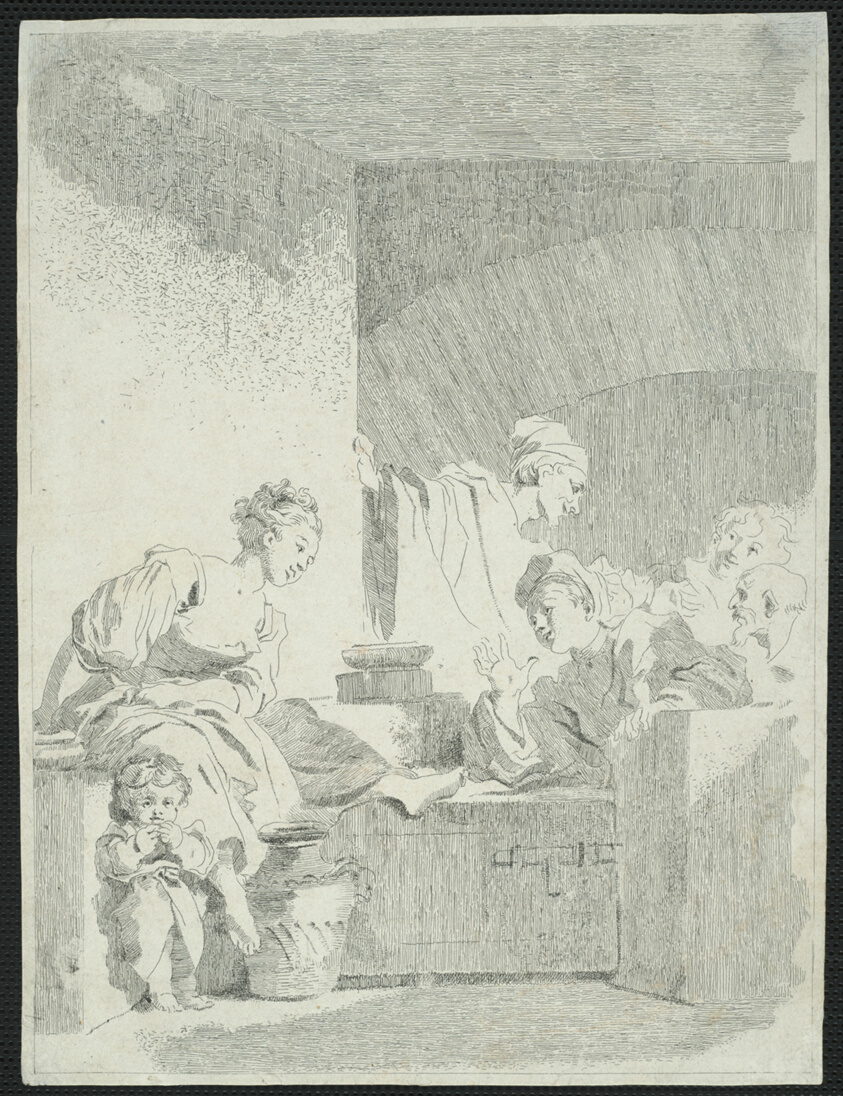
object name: Print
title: The Interior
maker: Jean-Honoré Fragonard; French, 1732-1806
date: 1778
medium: Etching on paper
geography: France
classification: etching; print; prints and drawing